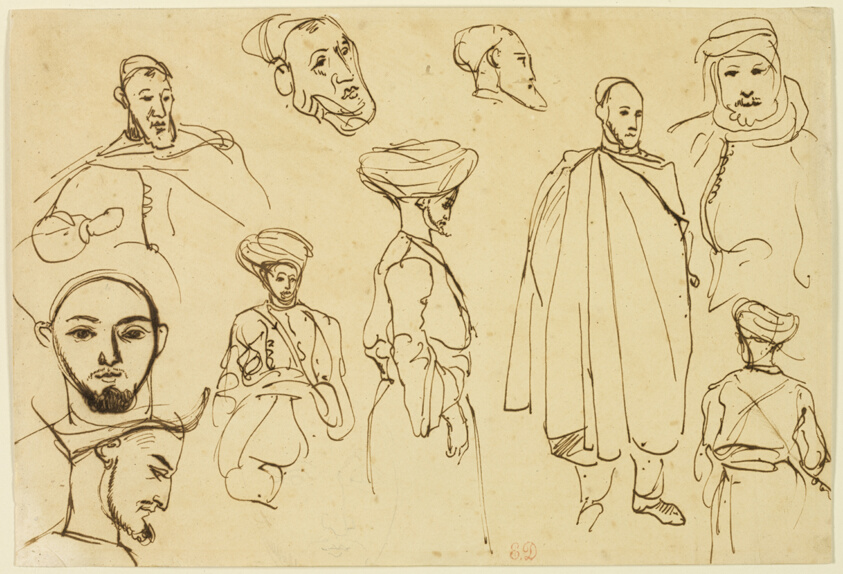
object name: Drawing and Watercolor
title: Sketches of Algerian Men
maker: Eugène Delacroix (French, 1798-1863)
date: c. 1832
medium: Pen and brown ink, with traces of graphite, on tan wove paper, laid down on cream wove paper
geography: France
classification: pen and ink drawings; drawings (visual works); prints and drawing